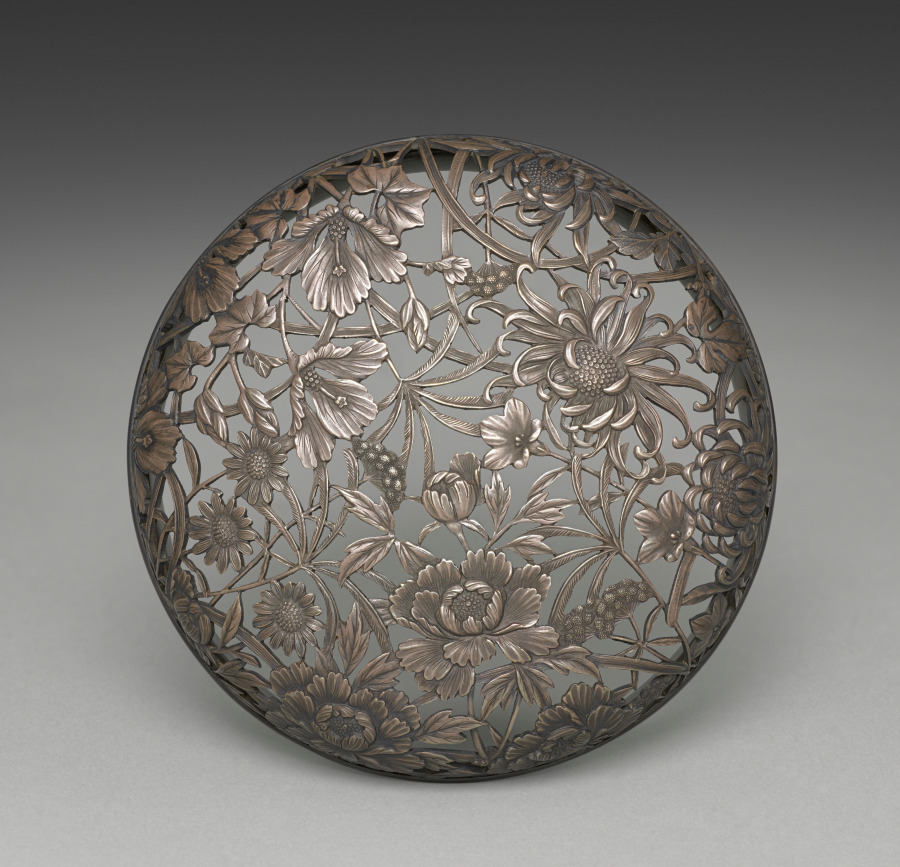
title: Lid for an Incense Burner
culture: Japan, Meiji period (1868–1912)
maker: Seifū Yohei III (Japanese, 1851–1914)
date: 1893–1914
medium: Floral openwork silver lid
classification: Ceramic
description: Yohei III made incense burners in a wide variety of designs and styles. The body and glaze of this one are taihakuji, or “great white porcelain,” an important early invention Yohei III devised in 1872 that involved the combination of a distinctive translucent, creamy glaze over an ivory-colored clay body. The burner has rounded, cabriole legs, resembling tiny table legs, attached to the exterior and the faintest decorative band around the bottom. It has a floral-patterned silver lid.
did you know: Lids were produced outside the studio by metalwork specialists.